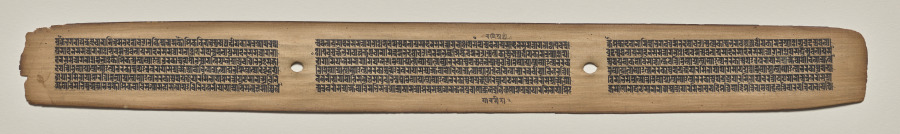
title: Text, Folio 21 (recto), from a Manuscript of the Perfection of Wisdom in Eight Thousand Lines (Ashtasahasrika Prajnaparamita-sutra)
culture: Eastern India, Bihar, Vikramashila Monastery. Painting: Nepal, Kathmandu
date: Sunday, September 14, 1119 (year 239 of the Newar Samvat in the month of Ashvina)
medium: gum tempera and ink on palm leaves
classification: Painting